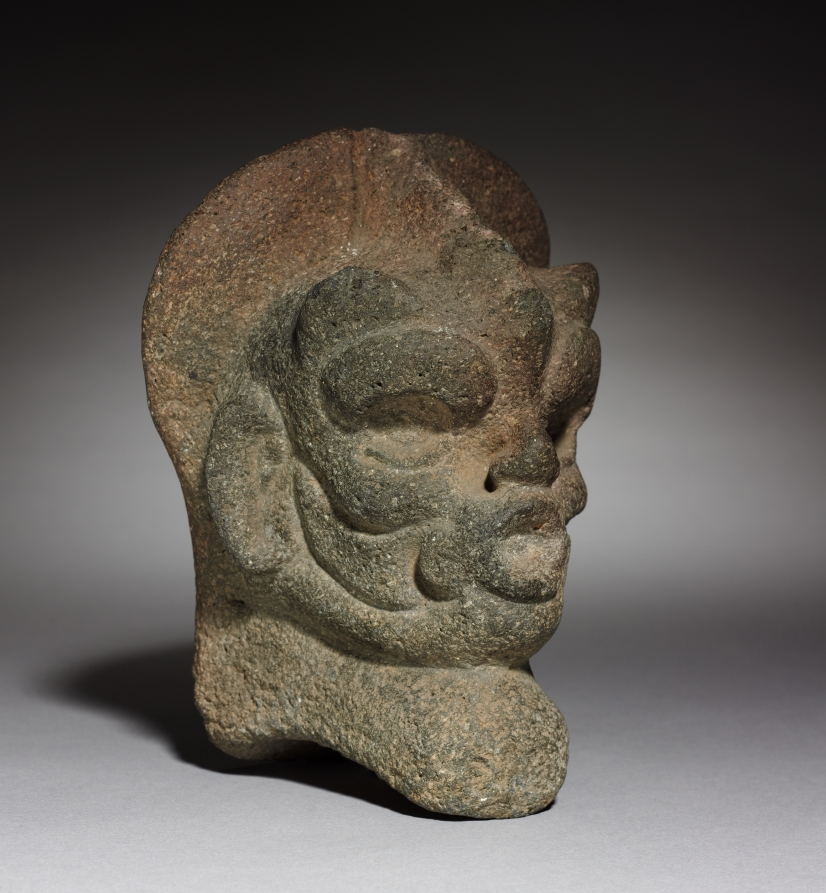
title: Head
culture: Mexico, Classic Veracruz (Totonac or Tajin)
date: 600–1100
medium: stone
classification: Sculpture